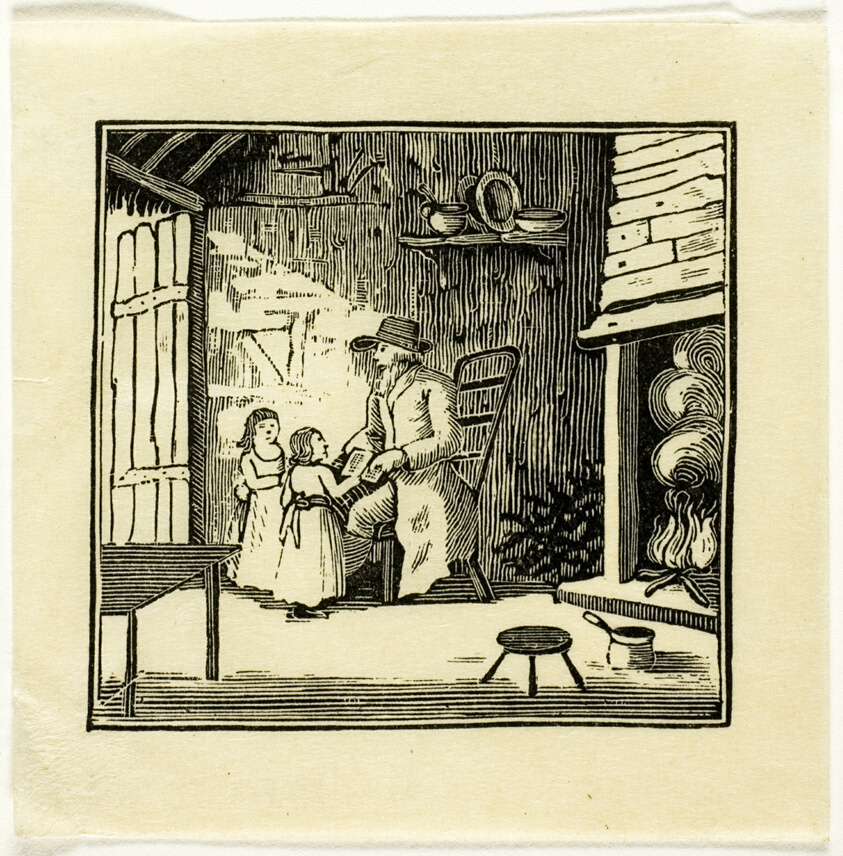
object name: Print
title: Book Illustration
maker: Thomas Bewick (English, 1753-1828)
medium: Wood engraving on paper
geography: England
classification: wood engraving; print; prints and drawing